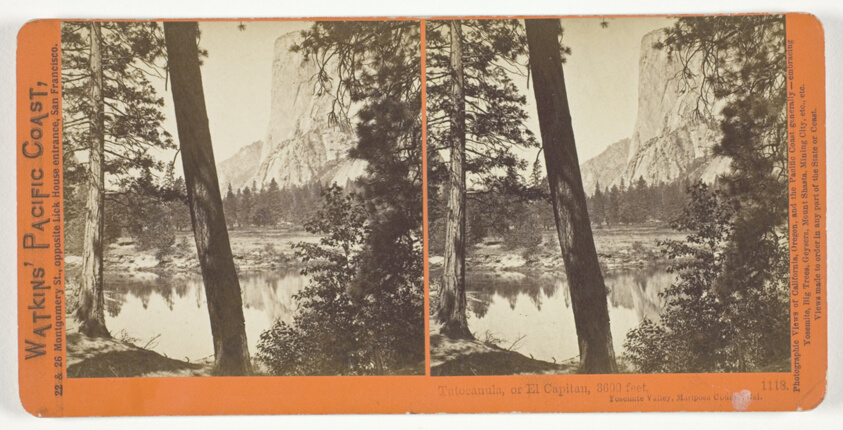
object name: Photograph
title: Tutocanula, or El Capitan, 3600 ft., Yosemite Valley, Mariposa County, Cal., No. 1118 from the series "Watkins' Pacific Coast"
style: 19th century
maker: Carleton E. Watkins; American, 1829-1916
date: 1861/76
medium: Albumen print, stereo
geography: United States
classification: stereograph (albumen); albumen silver print; photographic process; photography; photograph